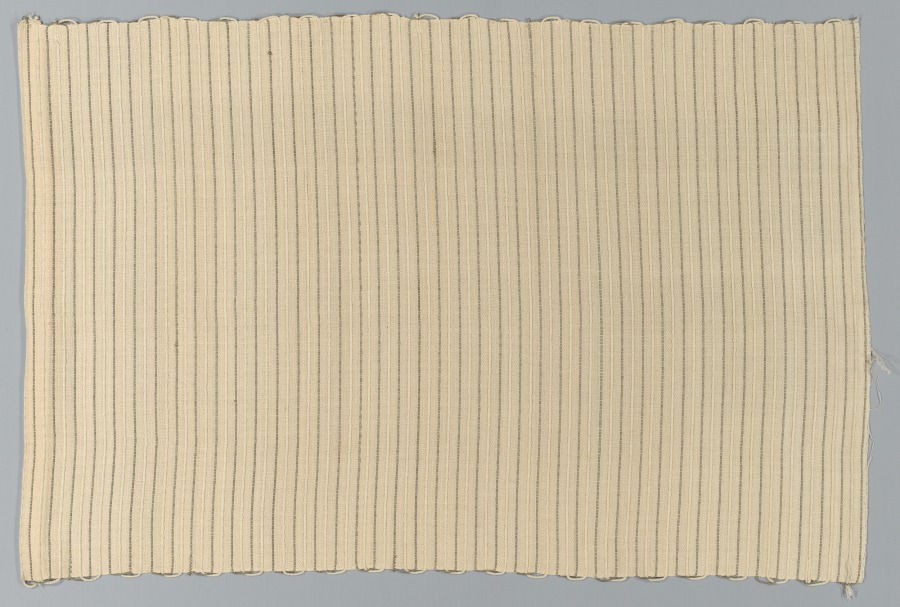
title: Hand-Woven Textile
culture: America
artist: Peri-Umana (American)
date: 20th century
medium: cotton and silver metallic thread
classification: Textile